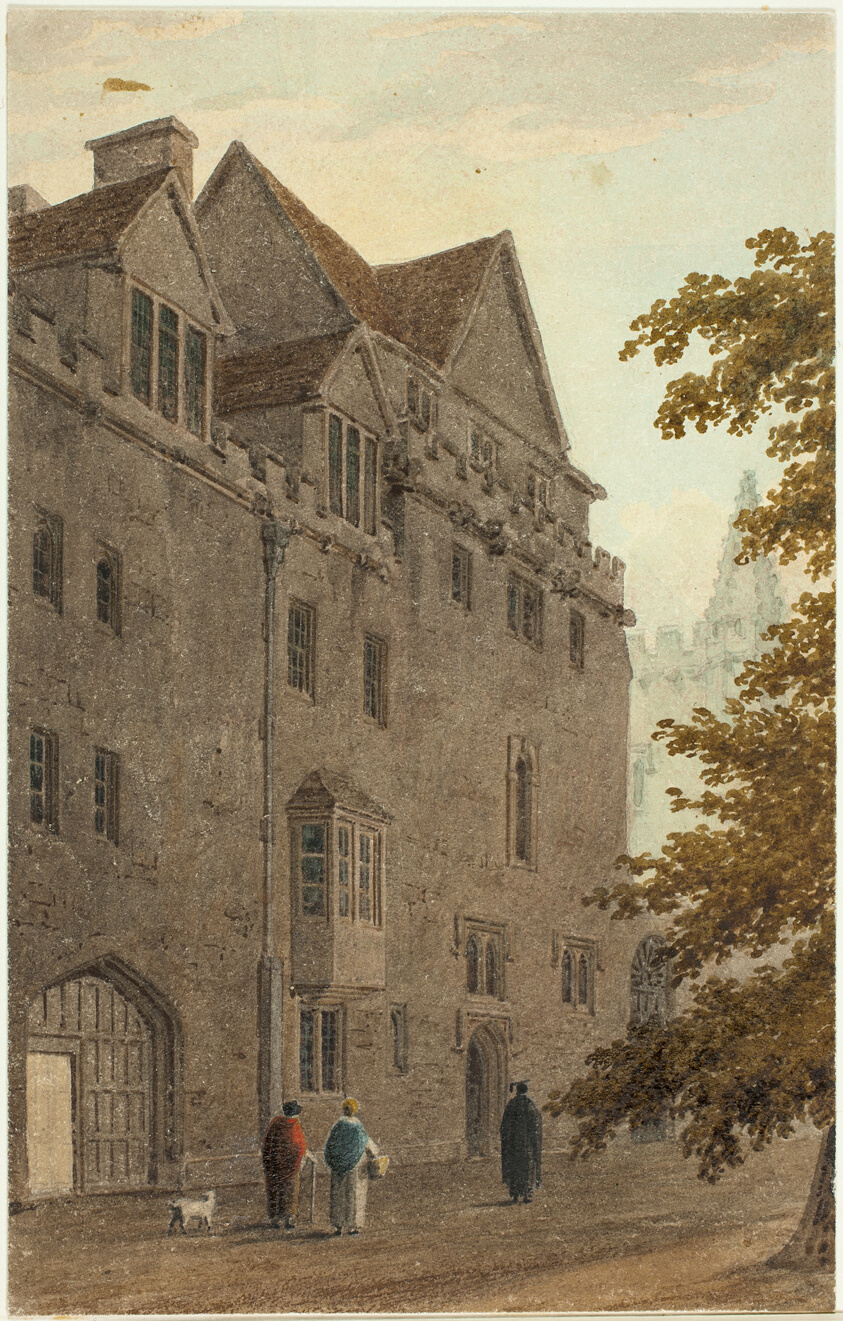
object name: Drawing and Watercolor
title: Old Magdalen Hall from the Gravel Walk Burnt Down A.D.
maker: Frederick MacKenzie (English, born Scotland, 1787-1854)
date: 1815/16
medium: Watercolor, with pen and brown ink, selectively varnished, on cream wove paper, laid down on ivory wove paper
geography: England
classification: watercolor; drawings (visual works); prints and drawing